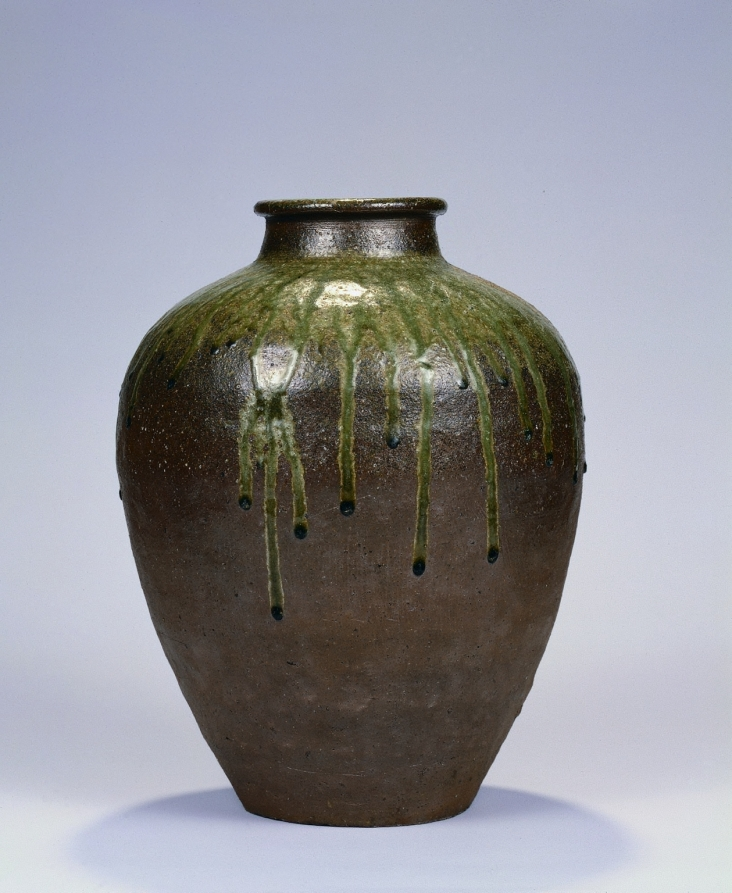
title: Water Jar: Ko Tamba ware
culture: Japan, Muromachi period (1392–1573)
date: mid-1500s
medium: stoneware with natural green ash glaze (Tamba ware)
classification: Ceramic